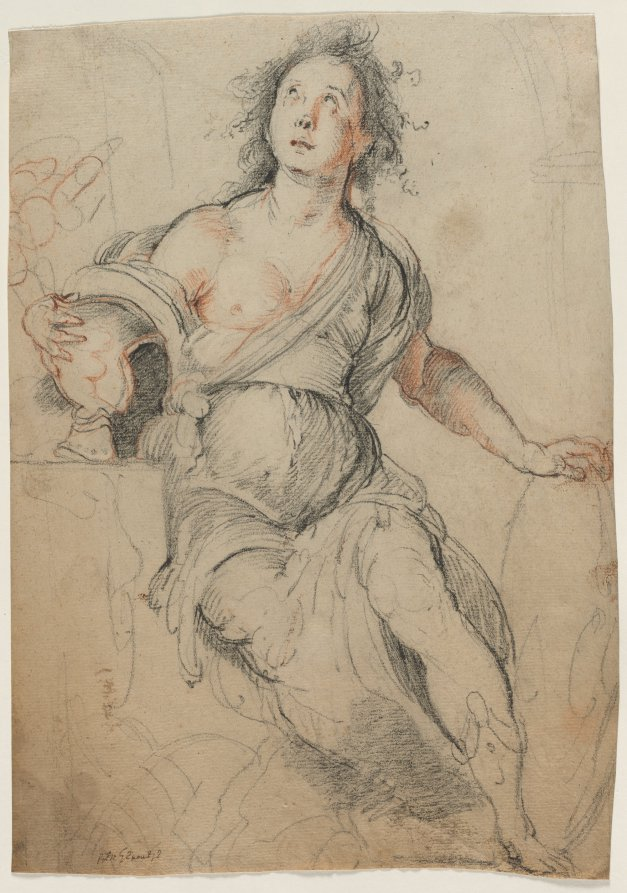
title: Allegorical Figure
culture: Italy, 17th century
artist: Bernardo Strozzi (Italian, 1581?-1644)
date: c. 1635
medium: black chalk with red chalk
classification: Drawing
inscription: lower left, in brown ink: Prete Genovese; verso, lower center, in brown ink: P.G. r: 35.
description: The Genoese painter Bernardo Strozzi drew this female figure in preparation for one of his major oil paintings, also in the collection of the Cleveland Museum of Art (1929.133). Recent scholarship has convincingly identified the subject as Minerva. The Roman goddess of war has put aside her armor for more contemplative pursuits; her upward gaze—as if seeking inspiration—recalls her other associations with wisdom, eloquence, and the arts. The figure is one of a number of single female figures associated with intellectual and artistic pursuits made by Strozzi in the 1630s when he lived and worked in Venice. Such works appealed to his learned patrons in northern Italy.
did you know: Drawings by Bernardo Strozzi are exceedingly scarce, especially full worked-up preparatory drawings such as this study for Minerva.